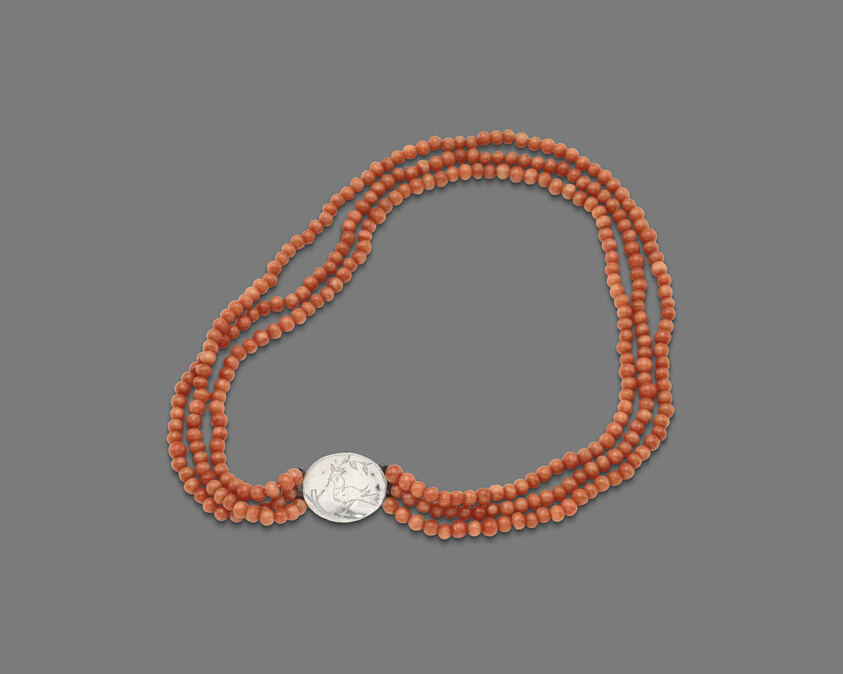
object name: Costume and Accessories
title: Clasp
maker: Attributed to Randall Yetton; American, 18th century; Philadelphia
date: 1736–44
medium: Silver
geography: Philadelphia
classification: clasp (fastener); jewelry; american decorative arts; american arts; decorative arts